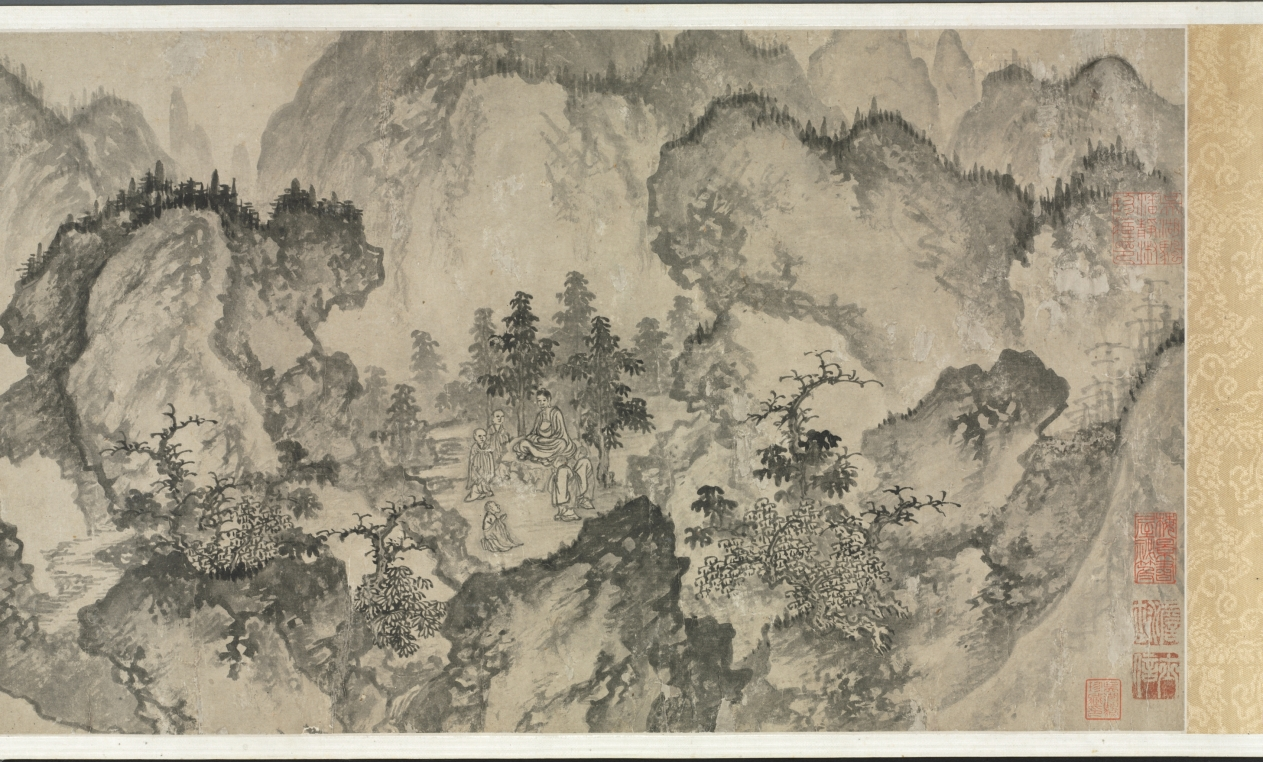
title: Buddha's Conversion of Five Bhiksu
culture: China, Yuan dynasty (1271–1368)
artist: Li Sheng (Chinese, active c. 1324–after 1375)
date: mid-1300s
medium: handscroll; ink on paper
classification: Painting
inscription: 紫篔生李升識 [印] 李氏子雲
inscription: 4 colophons and 12 additional seals: The "Heart" Sutra (Maha Prajnaparamita) text written by Wu Yuqing 吳餘慶 (active early 1400s); 2 seals of Xu Qianxue 徐乾學 (1631–1694); 3 colophons, one dated 1929 and two dated 1936, and 9 seals of Wu Hufan 吳湖帆 (1894–1968); 1 colophon, dated 1932, of Chen Dingshan; 1 seal unidentified.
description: This episode stems from the life of the historical Buddha, who, after his enlightenment, was initially hesitant about preaching his own doctrine. After much personal deliberation and prodding by deities, he finally relented. The first converts were the five guards who served him when he was still a prince. For Li Sheng, this is the pretext of the painting, which moves from the interaction of the bhiksu with the Buddha to a broader awareness of the vast surroundings of the scene.